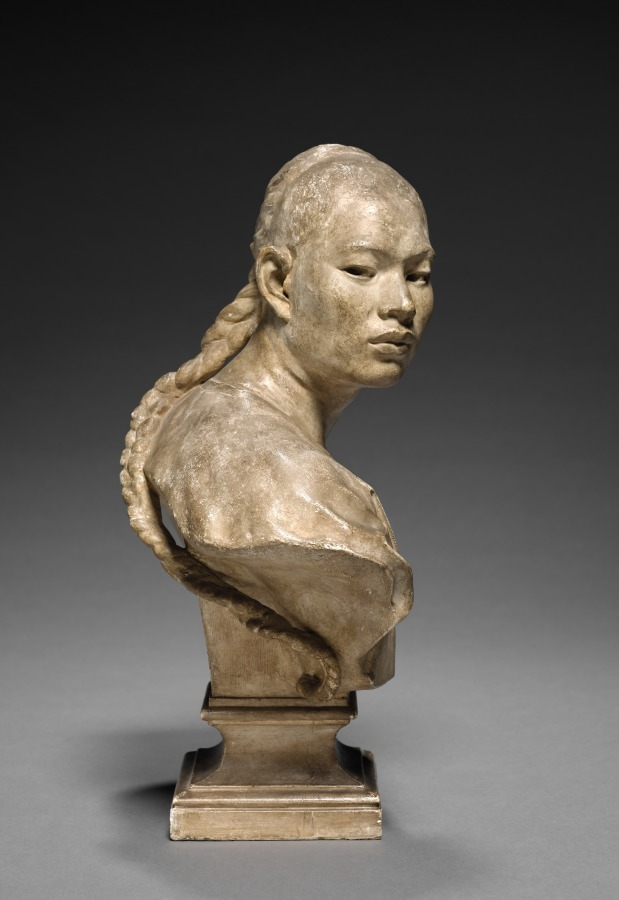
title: Bust of a Chinese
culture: France, 19th century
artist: Jean-Baptiste Carpeaux (French, 1827–1875)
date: 1867–68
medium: plaster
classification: Sculpture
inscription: inset into bust near base at rear is struck copper plate inscribed: "PROPRIETE CARPEAUX" with an eagle in the center.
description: This bust is related to the allegorical figure of Asia in Carpeaux's monumental bronze fountain, The Four Parts of the World Upholding the Celestial Sphere, commissioned by Baron Haussmann in 1867 for the Luxembourg Gardens in Paris. The figure was changed into a woman in the fountain and reflects the artist's interest in accurately portraying different ethnic groups. This bust exists in various sizes and media.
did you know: Greatly admired during his time, Jean-Baptiste Carpeaux received important commissions from French Emperor Napoleon III and Baron Georges-Eugène Haussmann.